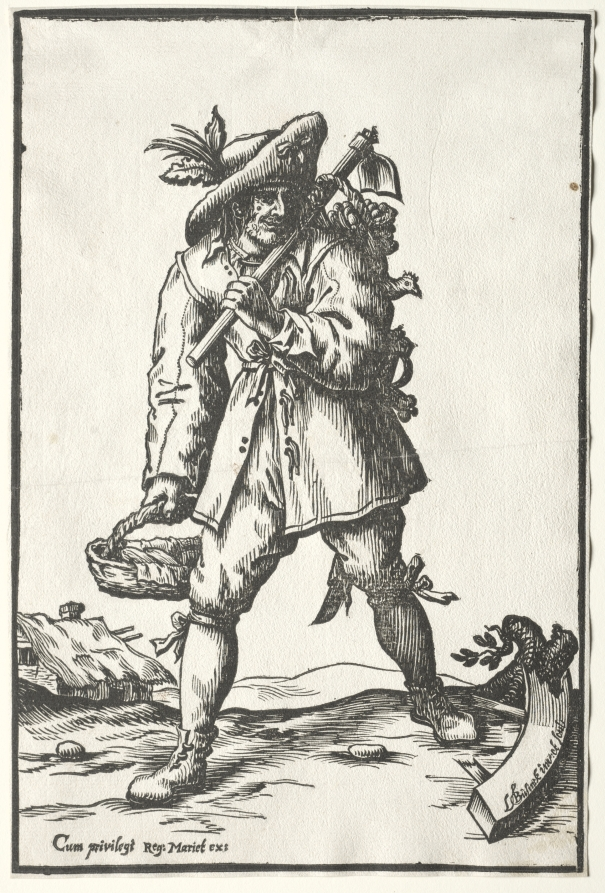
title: Peasant with Hoe, Basket and Hen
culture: Germany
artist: Ludolph Büsinck (German, 1590–1669)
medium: woodcut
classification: Print